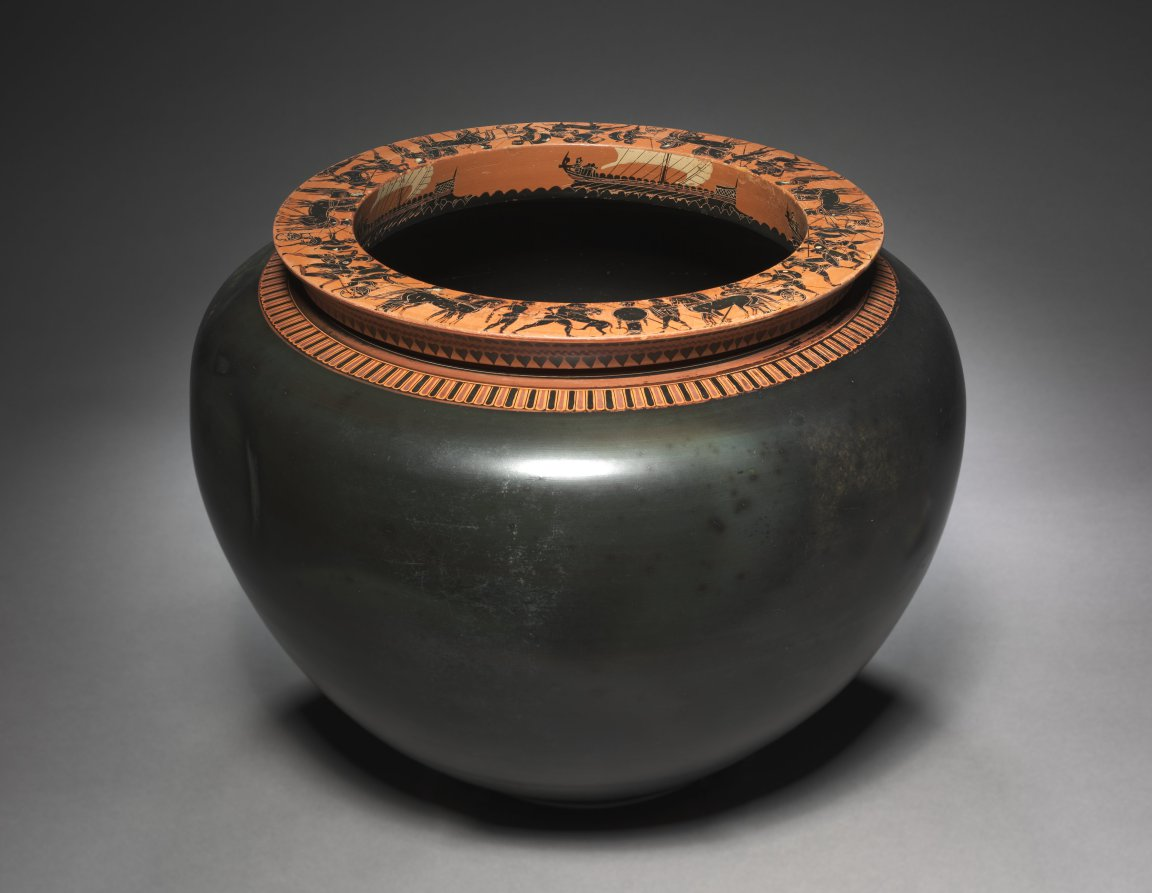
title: Black-Figure Dinos (Mixing Vessel): Warships (Int.); Heroic Scenes (Top)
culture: Greek, Attic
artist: circle of Antimenes Painter (Greek, Attic, active c. 530–510 BCE)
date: c. 520–515 BCE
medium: ceramic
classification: Ceramic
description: Designed for use at a symposium, or drinking party, this large dinos has a wide mouth allowing easy access to its contents—wine mixed with water (and sometimes other ingredients for flavoring). While drinking, symposiasts would often recite poetry and celebrate the mythological exploits of gods and heroes, perhaps prompted by the images painted on their pottery. Here, the vase-painter clearly anticipated such use; when the vessel was full, the ships painted on the inside of the rim would appear to sail across the “wine-dark sea” (to borrow a phrase found frequently in Homer’s Iliad and Odyssey). Other heroic scenes, including Herakles wrestling the Nemean lion and Theseus battling the Minotaur, appear on top of the rim, interspersed with chariots and anonymous combats.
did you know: Unable to stand on its own, this round-bottomed vessel probably once had a separately made base.